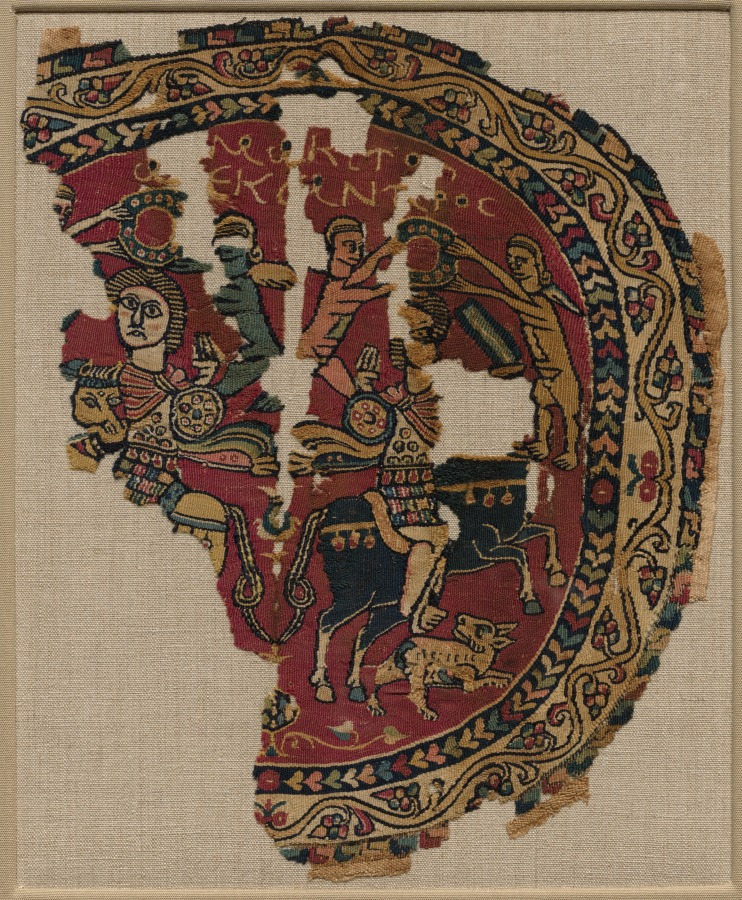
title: Alexander the Great on Horseback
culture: Egypt, Umayyad period (661–750) or Abbasid period (750–1258)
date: 700s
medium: dyed wool, undyed linen; plain weave and slit-tapestry weave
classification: Textile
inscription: partial inscription in Greek above.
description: Featuring imperial Byzantine themes, this rare roundel originally decorated a tunic. Genii (guardian spirits) crown the mounted horseman in military dress while an animal runs below. The inscription at the top identifies the horseman as Alexander the Great (356-323 bc), a popular cult figure in Egypt for centuries. The pattern’s mirror-image symmetry indicates the influence of costlier Byzantine silks.